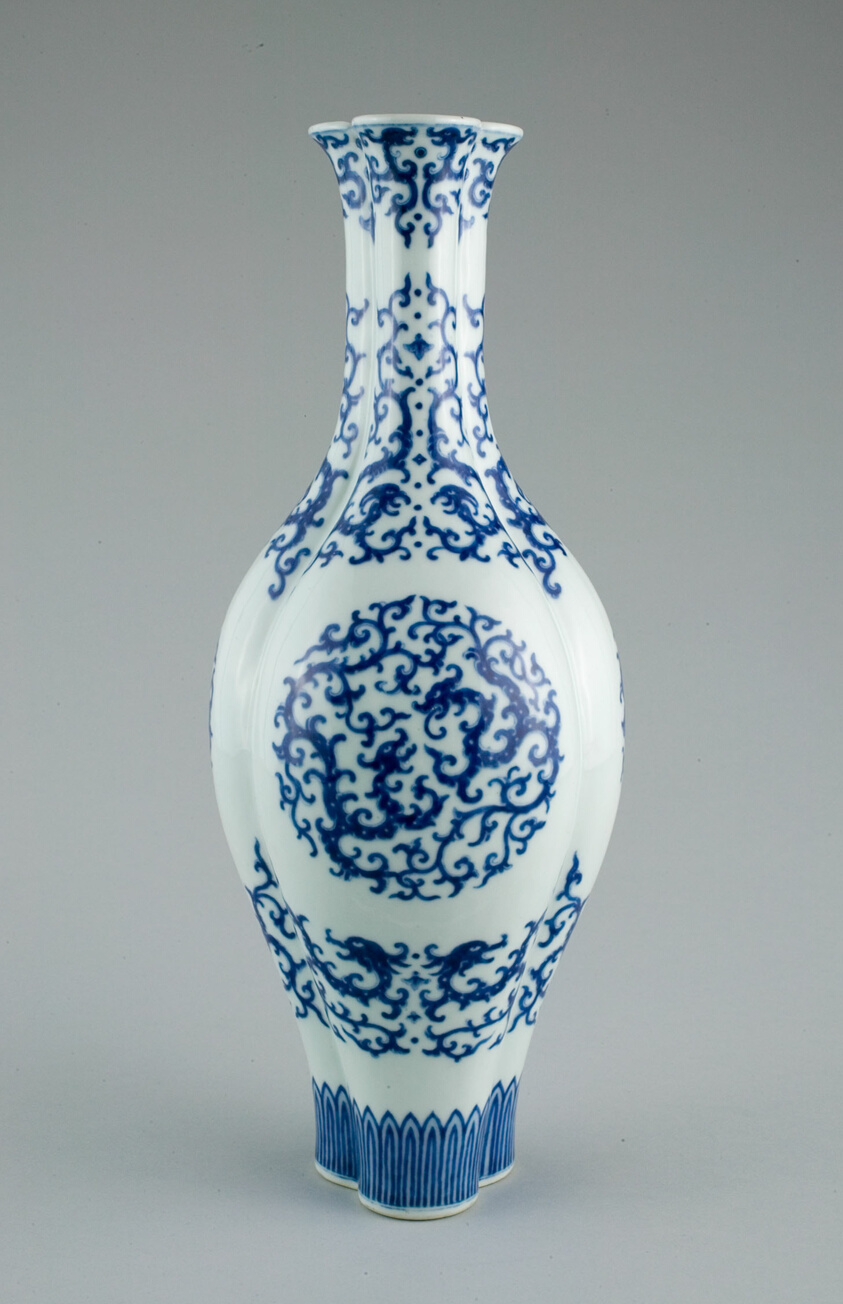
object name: Vessel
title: Triple Long-Necked Bottle Vase with Double Dragon Roundels and Elongated Curly Dragons (Gui)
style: Chinese (culture or style)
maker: China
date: Qing dynasty (1644–1911), Qianlong reign mark and period (1736–1795)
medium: Porcelain painted in underglaze blue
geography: China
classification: vase; porcelain; vessel; ceramics; asian art